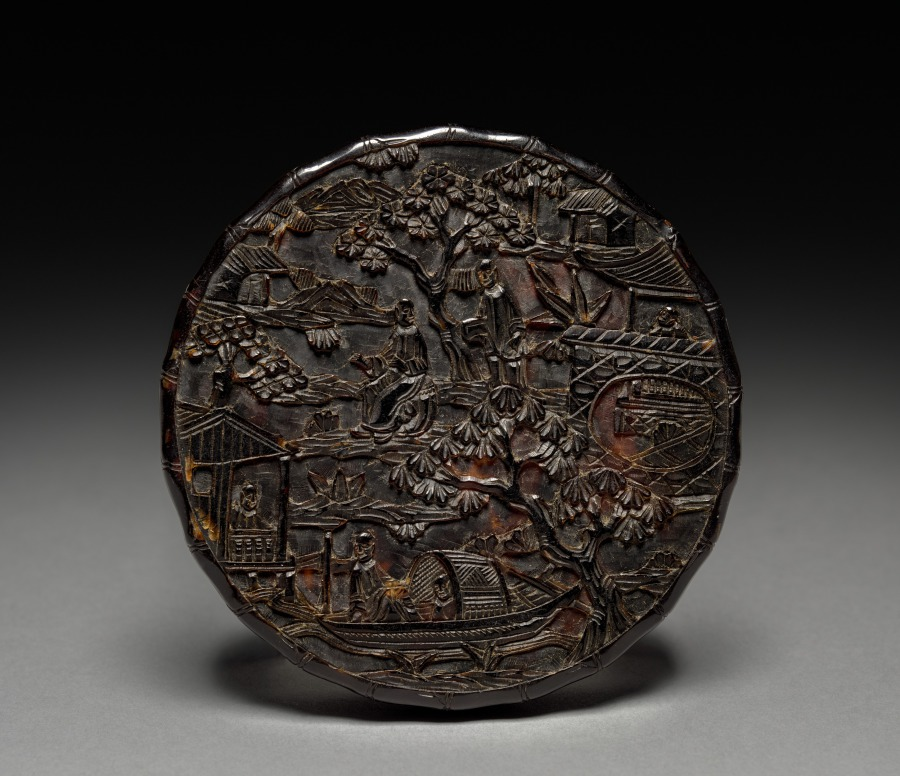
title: Fragrance Box (lid)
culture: China, Qing dynasty (1644-1911)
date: 1700s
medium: tortoiseshell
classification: Miscellaneous